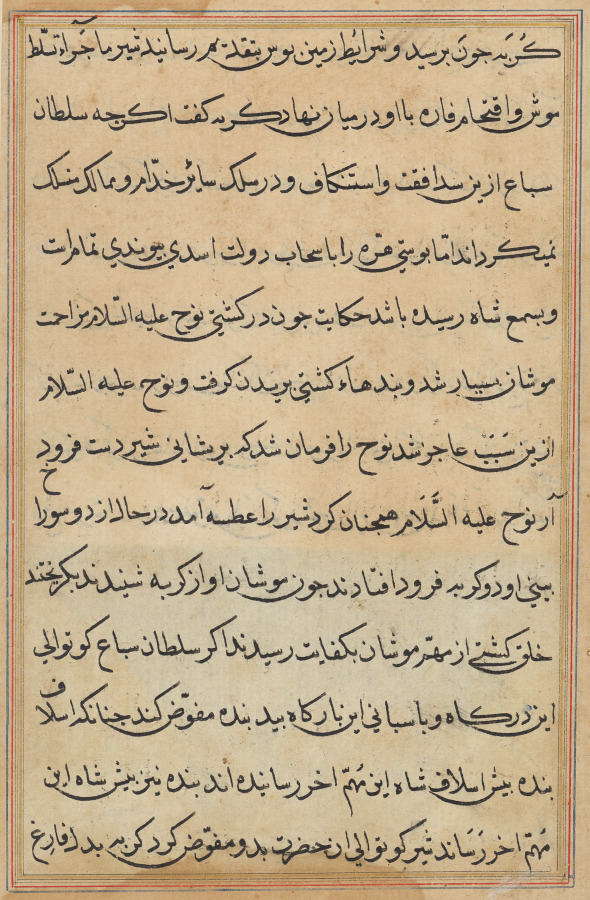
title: Page from Tales of a Parrot (Tuti-nama): text page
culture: Mughal India, court of Akbar (reigned 1556–1605)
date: c. 1560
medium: gum tempera, ink, and gold on paper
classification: Painting